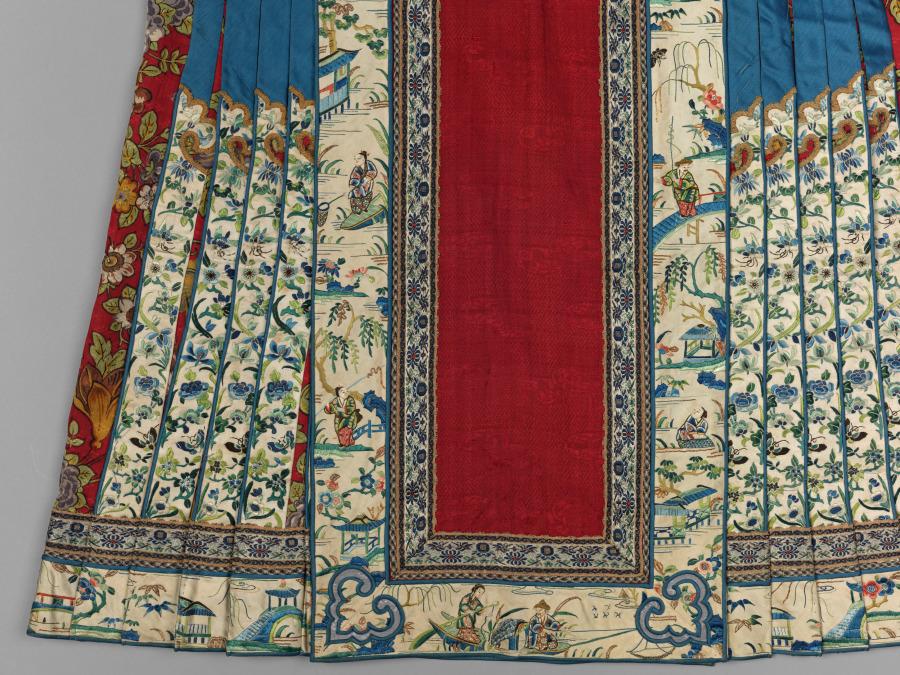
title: Skirt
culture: China, Qing dynasty (1644-1911)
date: 1800s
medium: Silk, cotton: embroidery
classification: Garment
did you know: This skirt includes both embroidered sections and polychrome printed fabric.